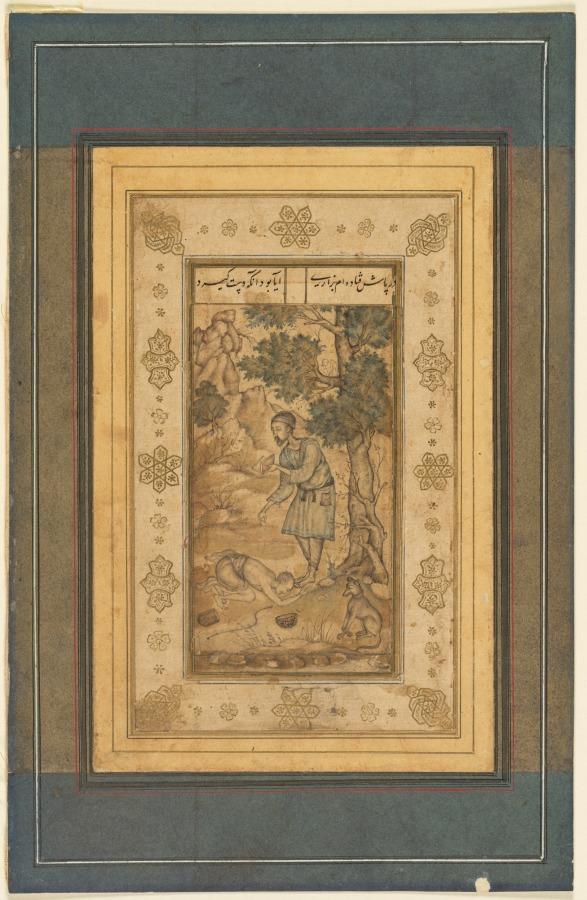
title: A mendicant bowing before a holy man, from the Prince Salim Album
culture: Mughal India, court of Akbar (reigned 1556–1605)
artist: Basavana (Indian, active c. 1560–1600)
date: c. 1585; inner border added in Allahabad c. 1602; outer border added probably 1900s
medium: Gum tempera, ink, and gold on paper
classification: Painting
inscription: Persian inscription on mendicant’s bowl, in nasta‘liq script: the work of Basavana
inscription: Persian verse at top from a ghazal (lyrical poem) of Hafiz (Persian, 1325–1389), in nasta‘liq script: I have fallen at his feet, grieving and wailing./ Could it be that I might receive a helping hand?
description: As the Mughal atelier grew into the 1580s, Indian artists become increasingly adept at incorporating Persian styles with a new dimensionality and naturalism that Akbar promoted, possibly based on his appreciation of European prints and paintings. Here, a sincere holy man wears robes tinged lightly with blue. He stands beneath a tree in the wilderness with a loyal jackal by his side. A devotee touches his head to his feet. The artist’s tiny signature is written on the alms bowl. Connoisseurs of Persian art in the Islamic world praised an artist’s virtuoso ability to work on a microscopic scale.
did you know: The dog stares hungrily at the mendicant’s alms bowl, with the artist’s signature.